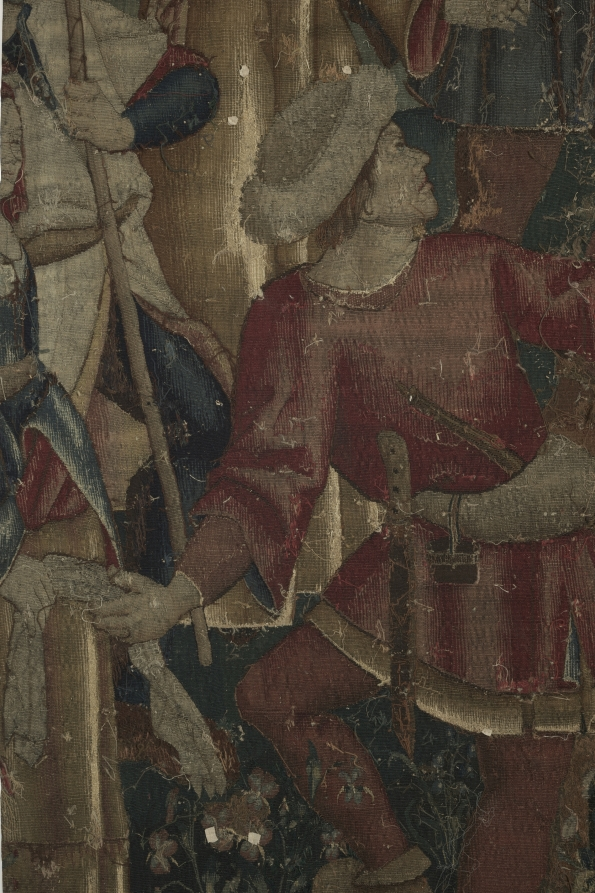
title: Shepherds in a Round Dance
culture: Netherlands, early 16th century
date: around 1500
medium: Wool and silk: tapestry weave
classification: Tapestry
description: Late medieval tapestries often use a limited yet contrasting color palette to portray stylized images. The expressions of these figures, for example, are conveyed more by their postures than by their faces. Four shepherds and shepherdesses join hands and dance to the music of a bagpiper at the far right, while a lord and two ladies on the left look on. A dog and sheep amid blossoming plants and trees contribute to the festive pastoral scene in front of a castle.